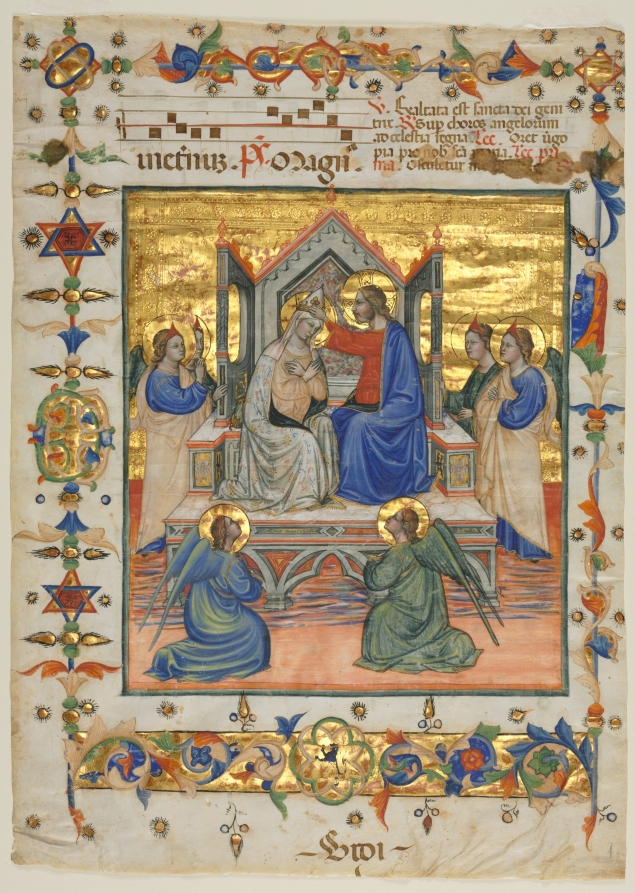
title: Leaf from an Antiphonary: Coronation of the Virgin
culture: Italy, Tuscany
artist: attributed to Master of the Beffi Triptych (Italian, active 1390–1425)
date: 1400s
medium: Ink, tempera, and gold on vellum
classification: Manuscript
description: The unidentified illuminator of this leaf is named after his work on a painted triptych that once hung behind the altar of the Church of Santa Maria del Ponte in the small village of Beffi in Abruzzo. Works by this illuminator are distinctive for their lively detail, highly expressive figures, and brilliant colors. In addition to panel paintings, this unknown artist also illuminated books and painted frescoes. The large scale of this miniature indicates that the leaf served as a frontispiece to a volume in a set of antiphonaries.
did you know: Gold leaf was always applied to a manuscript before the paint.